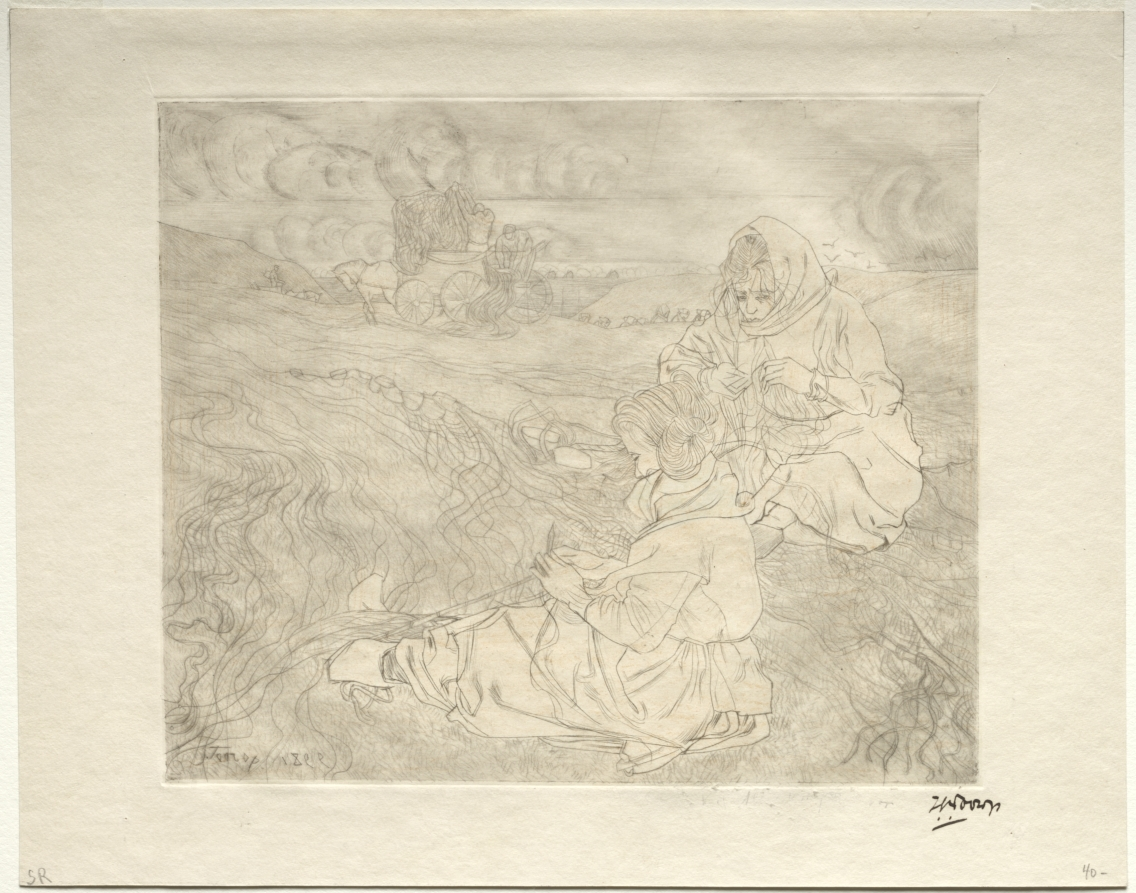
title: Net Menders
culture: Netherlands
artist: Jan Toorop (Dutch, 1858–1928)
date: 1899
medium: etching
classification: Print